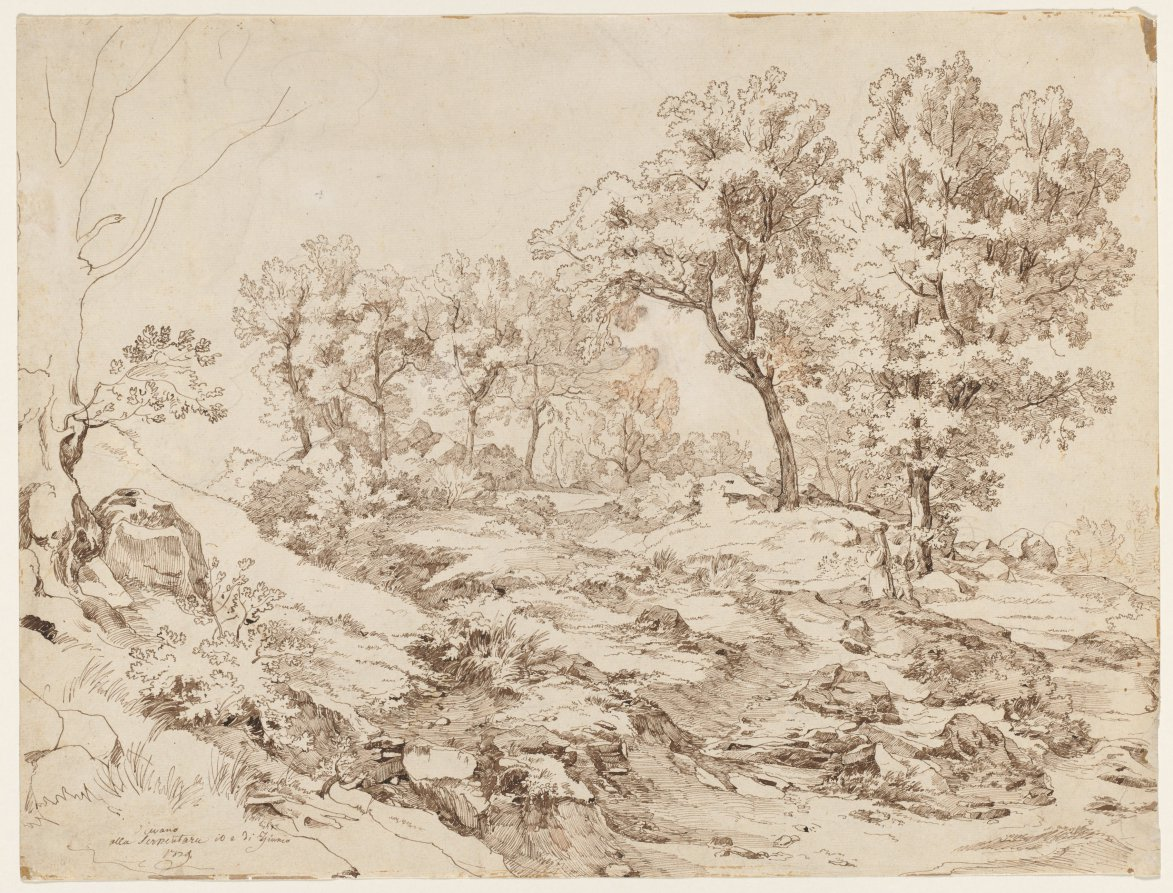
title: La Serpentara near Olevano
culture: Germany, 19th century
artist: Friedrich Preller (German, 1804–1878)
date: 1829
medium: pen and brown ink over black chalk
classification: Drawing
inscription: by artist, lower left, in brown ink: Olevano / alla Serpentara il 2 di Guinio / 1829.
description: Friedrich Preller studied in Weimer, Dresden, and Antwerp before winning a stipend from Grand Duke Karl Alexander von Sachsen-Weimar to study in Rome. During his years in Italy (1828-31), he formed important ideas about landscape painting that would develop into a long career in Germany as a landscape painter. Like his teacher in Italy, the painter Joseph Anton Koch, Preller was inspired by the area known as La Serpentara around the picturesque mountain village of Olevano, southeast of Rome. He made numerous trips there and was especially struck by the oak forest depicted in this drawing. He inscribed the drawing with the locale and date (2 June 1829) in its lower left corner. His lively pen work leaves the lightest areas in outline only, so that the white of the paper helps record the fresh and bright atmosphere of the scene, set in relief by darker areas of firm, parallel hatching. Preller later wrote about the area around Olevano: "Nowhere was the organic coherence in nature so clear as there, and my observation was mainly directed toward that."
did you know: Like many of his German contemporaries in the early 19th century, here Friedrich Preller relied on precise pen lines only without use of brushwork or wash.